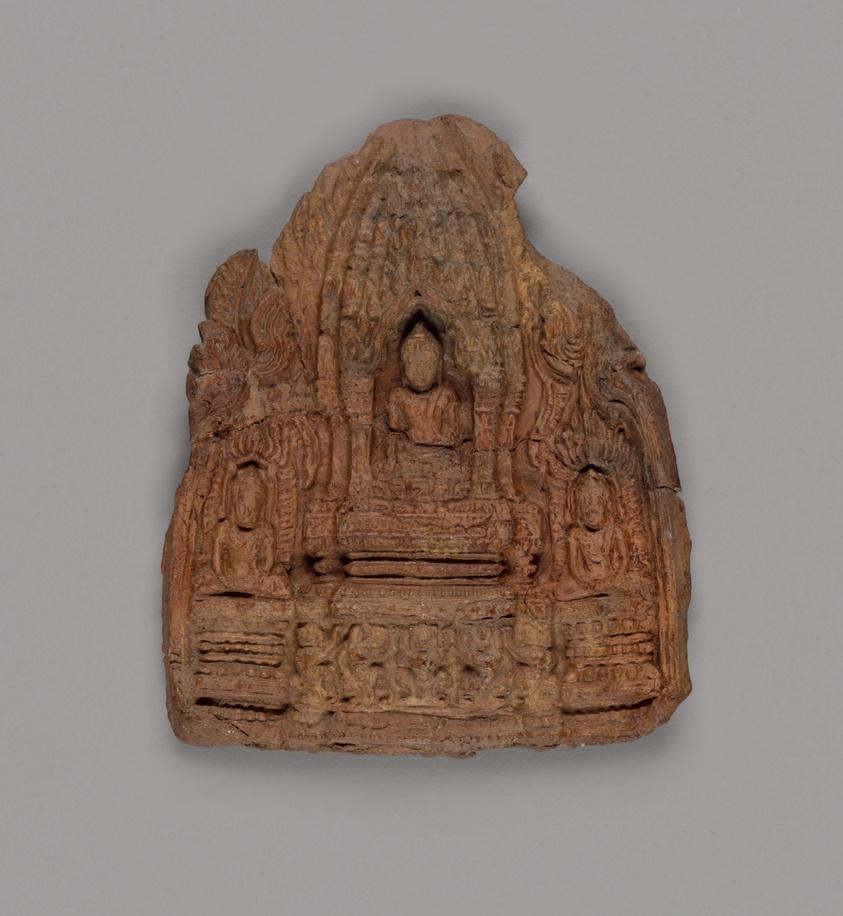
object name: Religious/Ritual Object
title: Votive Tablet of Gautama Buddha with Attendant Buddhas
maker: Thailand; Lamphun Province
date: 12th/13th century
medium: Terra-cotta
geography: Northern region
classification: bone; asian art; shrine; ritual objects